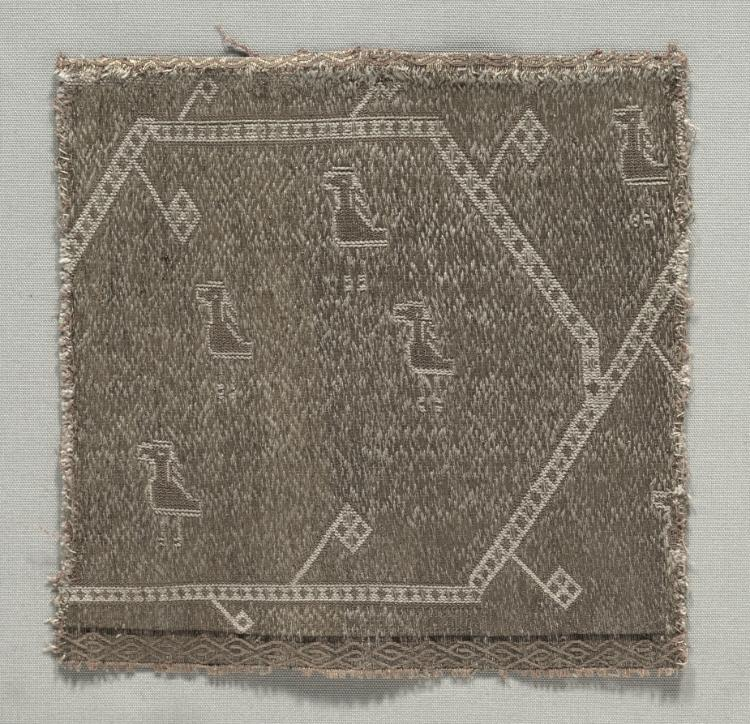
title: Fragment of a Chasuble Orphrey Cross Band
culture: Italy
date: 1000s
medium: Silk and gold metallic thread: tablet weave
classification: Textile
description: This fragment shows four small gold birds outlined in white and enclosed in a compartment formed by a white band decorated with small diamonds in gold. White lines with squares at the end containing small gold diamonds project from the band at intervals. Along the top and bottom of the piece is a guilloche band. Interlaced lines are gold with salmon outlines on gold ground.